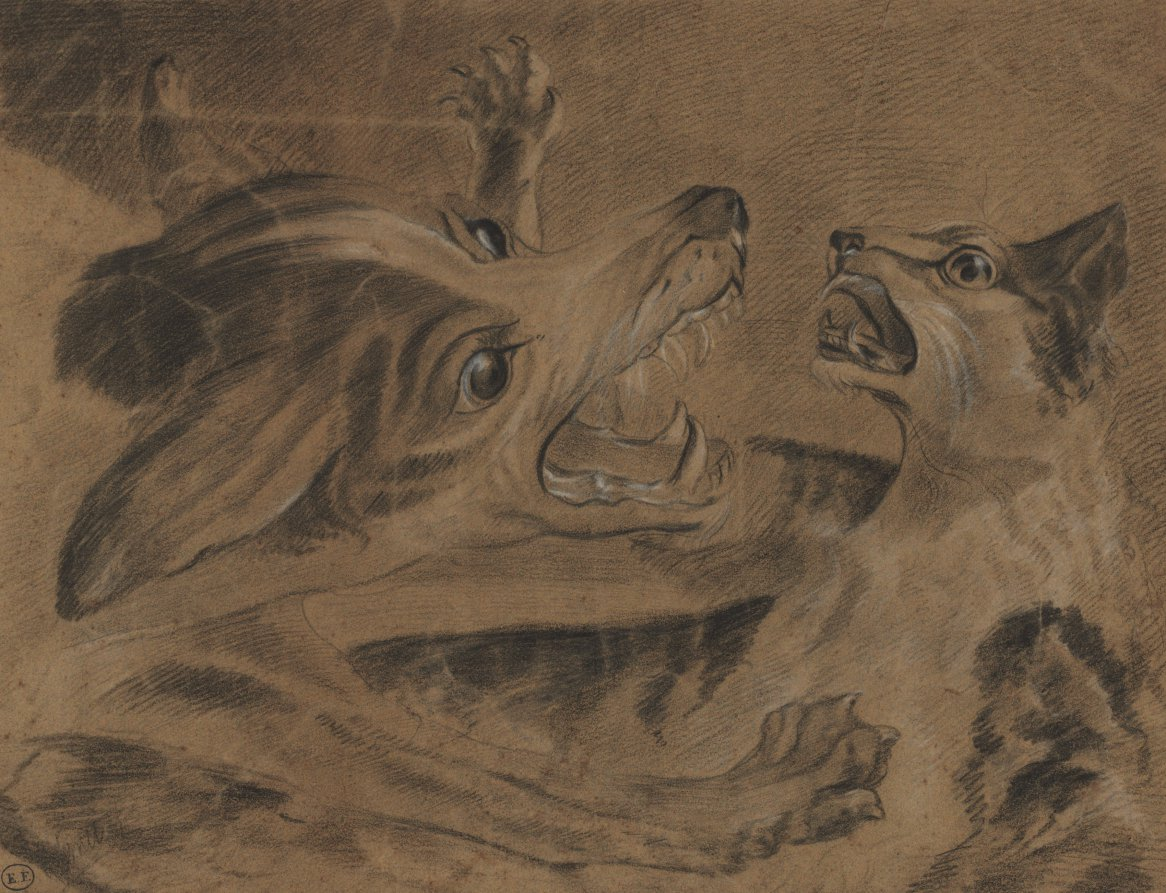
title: Fighting Animals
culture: France, late 18th-19th Century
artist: Carle Vernet (French, 1758–1836)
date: fourth quarter 18th century or first third 19th century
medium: grpahite and black chalk with stumping [both have been stumped] heightened with white chalk; framing lines in black chalk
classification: Drawing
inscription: signed, lower left, in black chalk: Vernet [underlined]